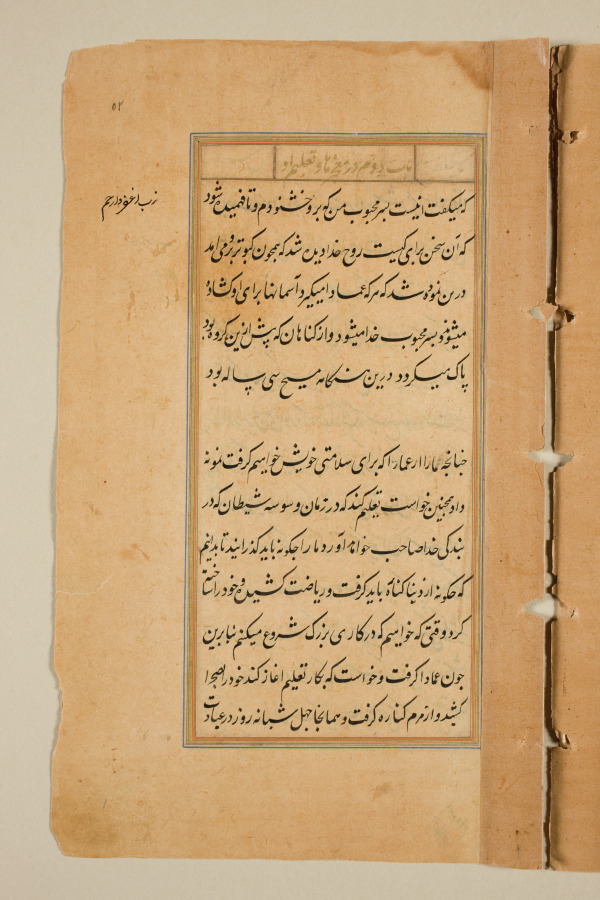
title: Text page from a Mirror of Holiness (Mir’at al-quds) of Father Jerome Xavier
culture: Mughal India, Allahabad, made for Prince Salim (1569–1627)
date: 1602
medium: Ink and gold on paper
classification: Manuscript